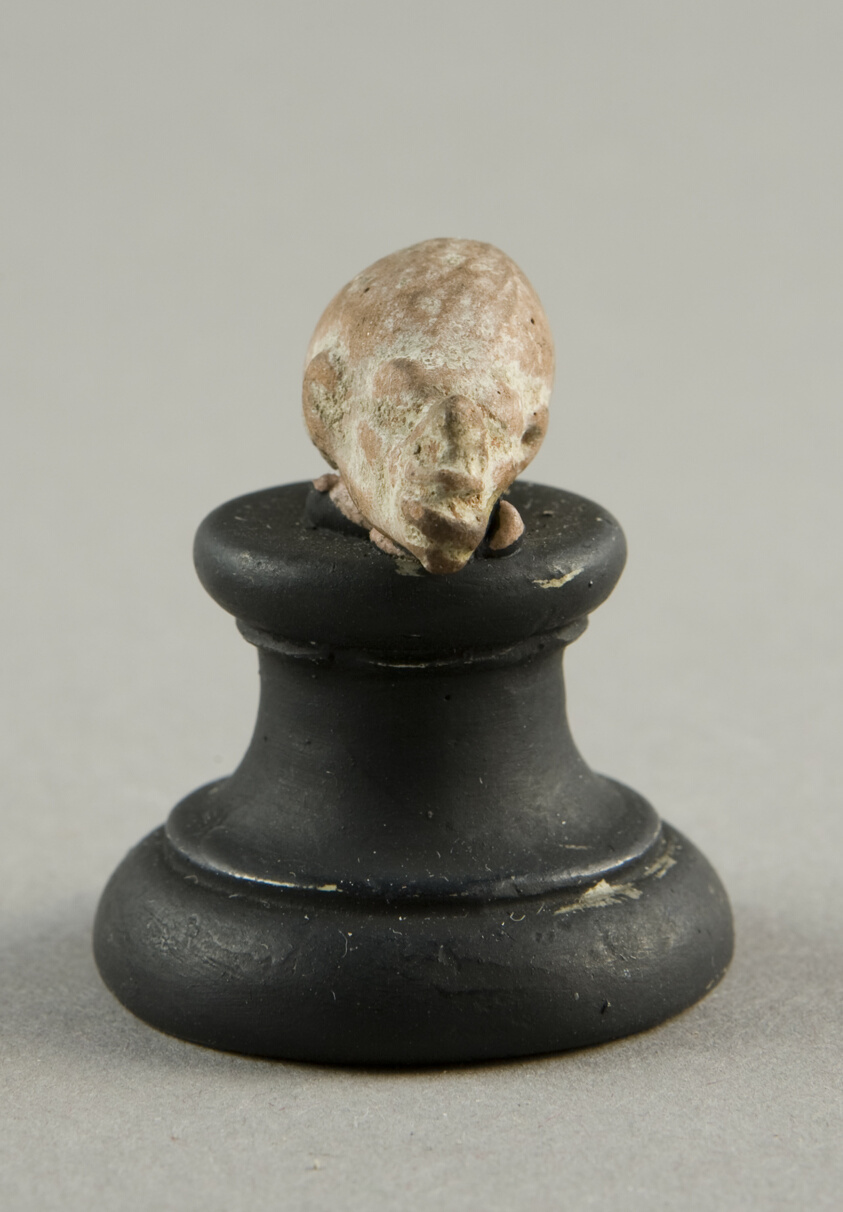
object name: Sculpture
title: Head of a Grotesque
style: greek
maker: Greek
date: 2nd-1st century BCE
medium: terracotta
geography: Greece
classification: earthenware; ceramics; sculpture; ancient art